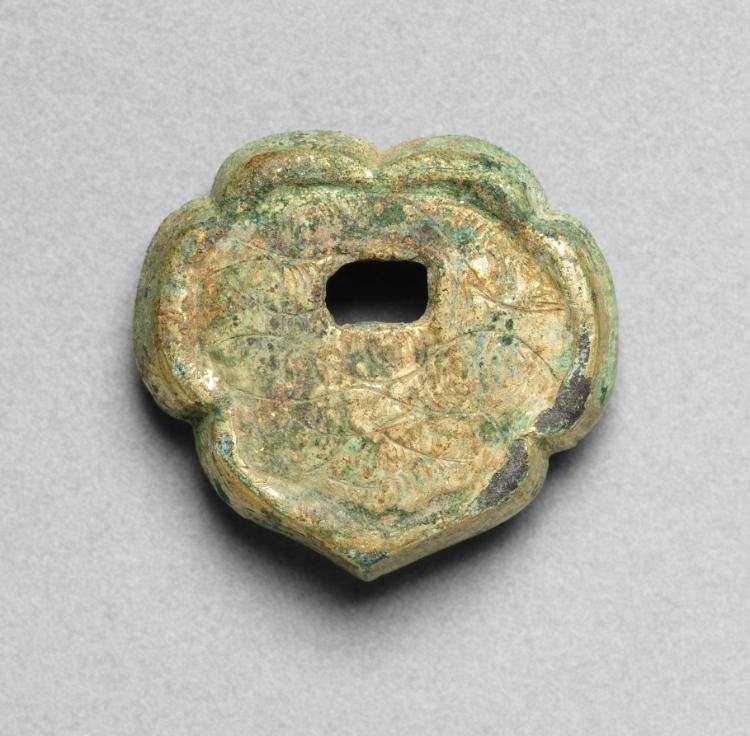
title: Nail Cover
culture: Korea, Goryeo dynasty (918–1392)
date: 918–1392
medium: bronze gilt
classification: Metalwork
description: Metallurgy advanced remarkably in the Goryeo period (918–1392), explaining why a large quantity of gilt-bronze artifacts were found in burial sites. This particular object was used to decorate a wooden coffin.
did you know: This particular object was used to decorate a wooden coffin.